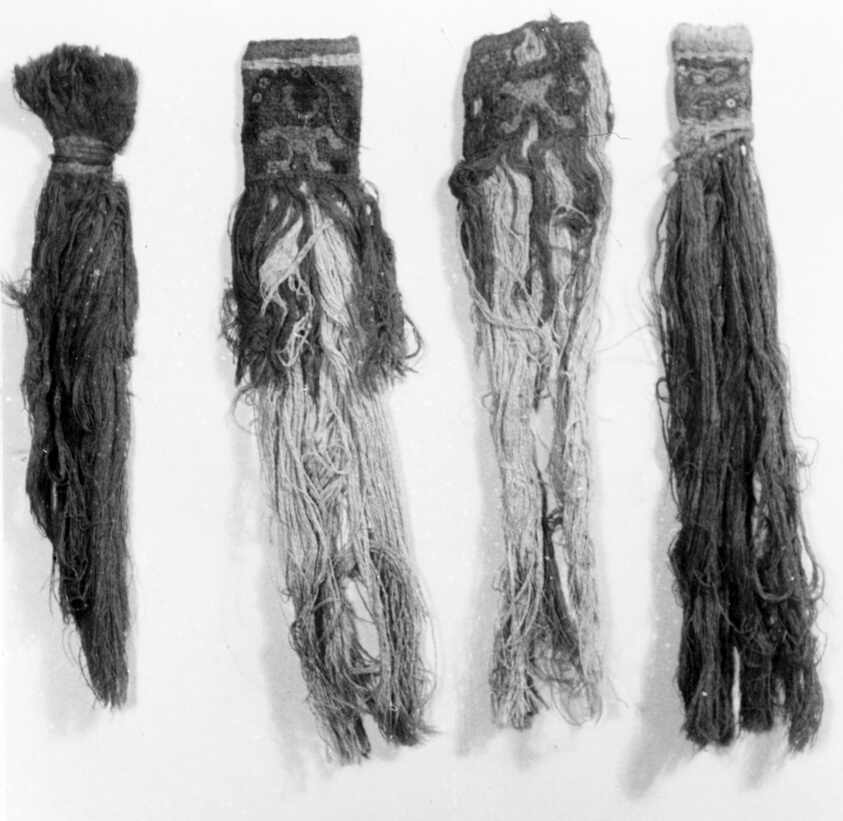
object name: Textile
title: Tassels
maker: Peru, Possibly central coast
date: A.D. 1000/1476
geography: Peru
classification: textile; weaving